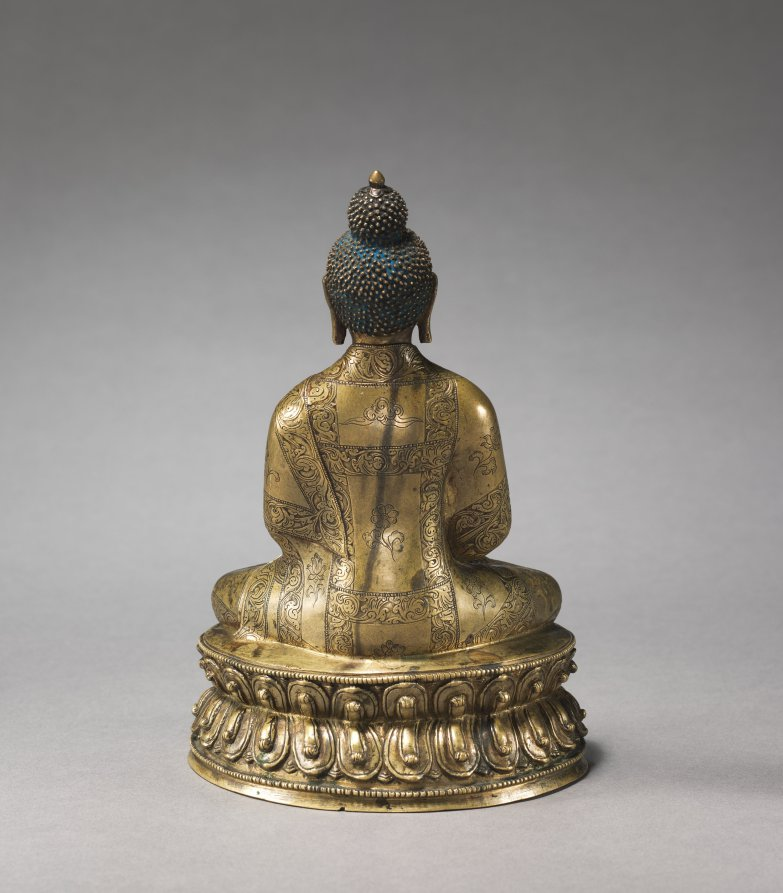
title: Seated Maitreya Buddha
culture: Western Tibet, Yongle Period (1403-1424)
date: c. 1400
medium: bronze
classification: Sculpture